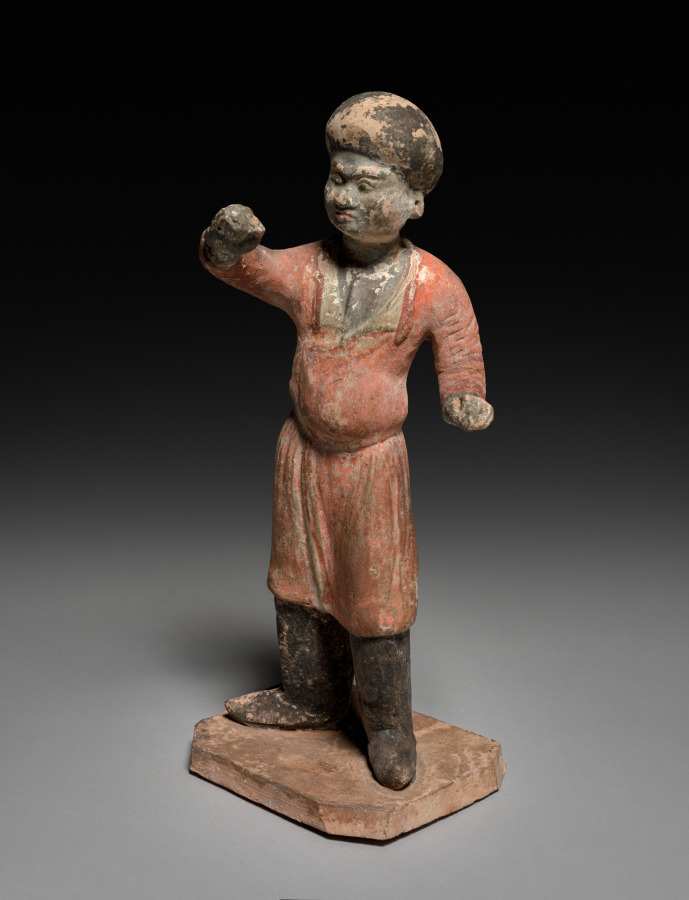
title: Groom (Tomb Figure)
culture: China, Sui dynasty (581-618) - Tang dynasty (618-907)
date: late 500s–early 600s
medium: buff earthenware with polychromy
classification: Sculpture